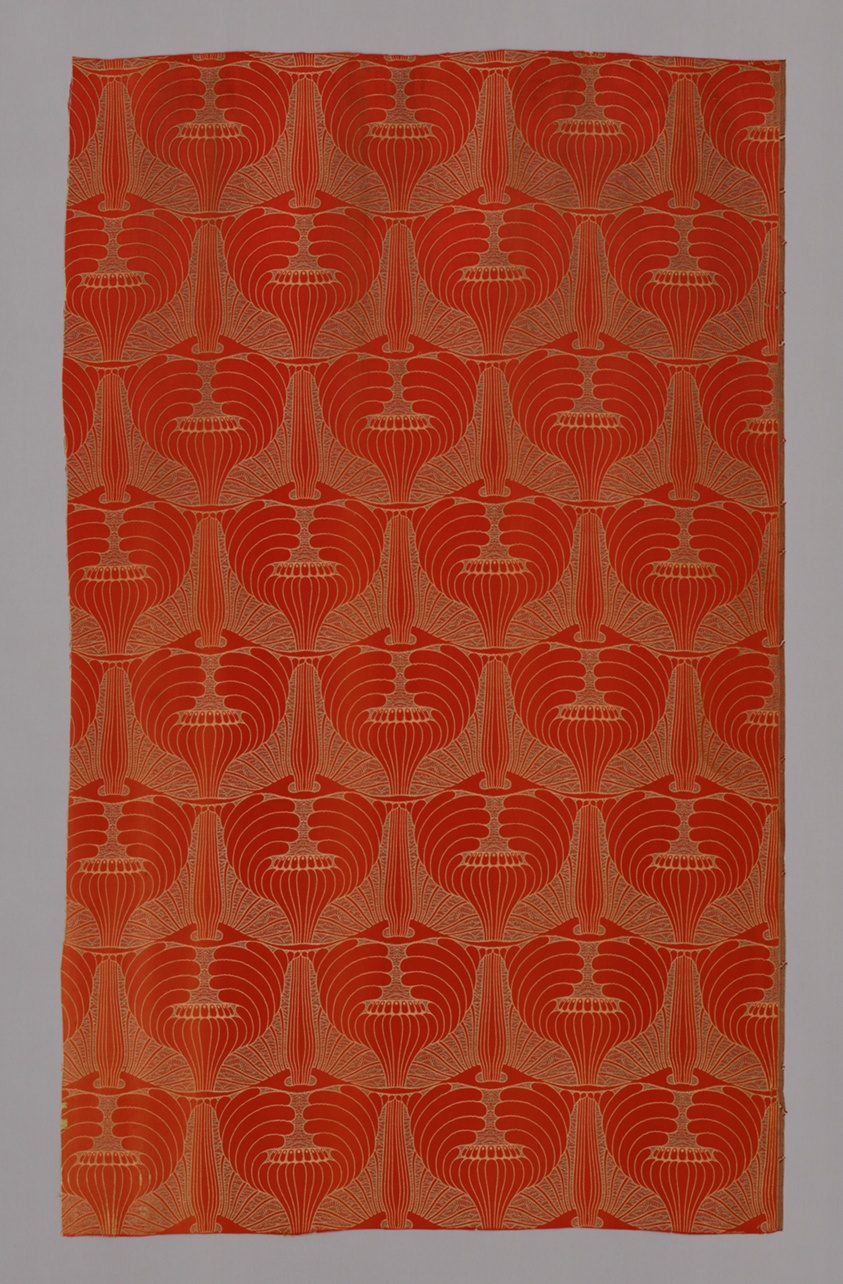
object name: Textile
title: Mohnköpfe (Poppyheads) (Dress or Furnishing Fabric)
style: Modernism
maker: Designed by Koloman Moser (Austrian, 1868–1918); Produced by Johan Backhausen und Söhne (Austrian, founded 1849); Austria, Vienna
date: 1900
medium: Silk, wild silk, and cotton, warp-float faced 15:1 satin weave self-patterned by ground weft floats; woven on loom with Jacquard attachment; right selvage present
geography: Vienna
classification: textile; weaving; furnishing textile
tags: red (color), floral motifs, fashion